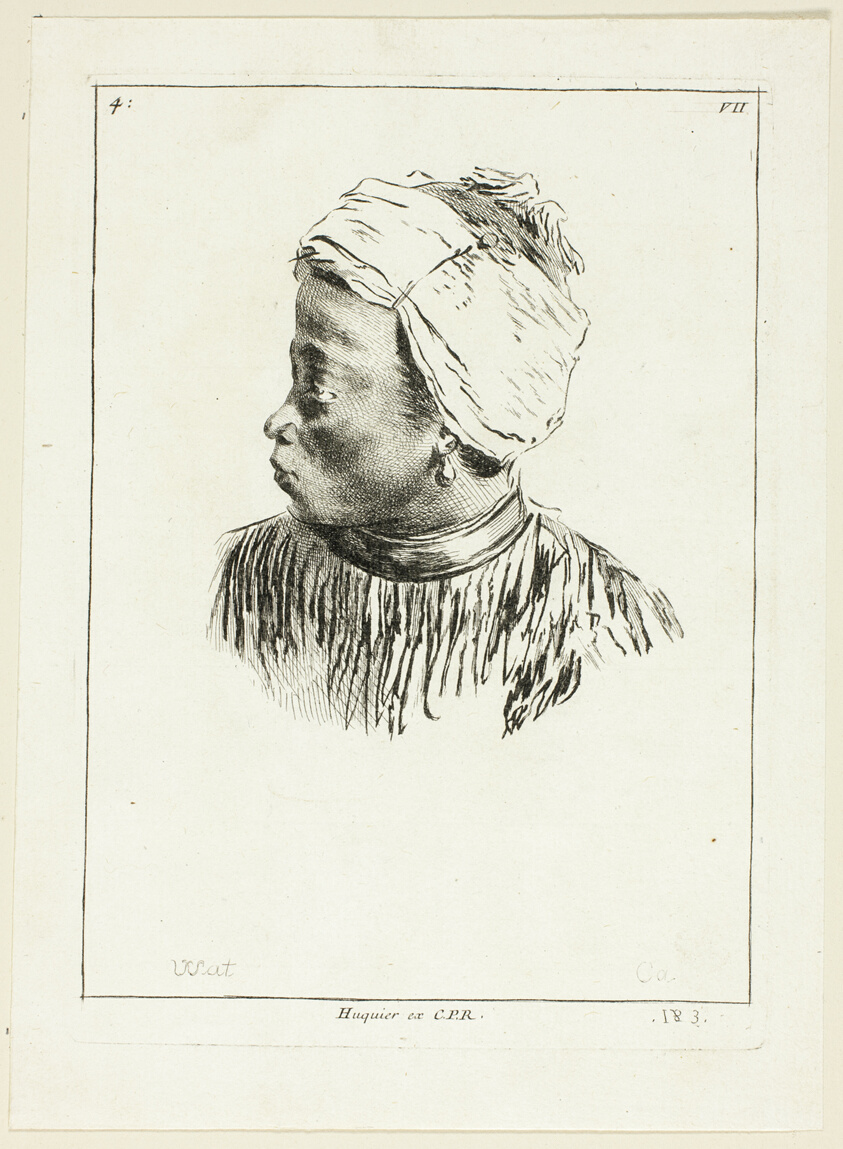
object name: Print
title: Head of a Black Man in Profile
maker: Anne Claude Philippe Caylus (French, 1692-1765)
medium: Etching and engraving on paper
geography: France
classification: etching; print; prints and drawing